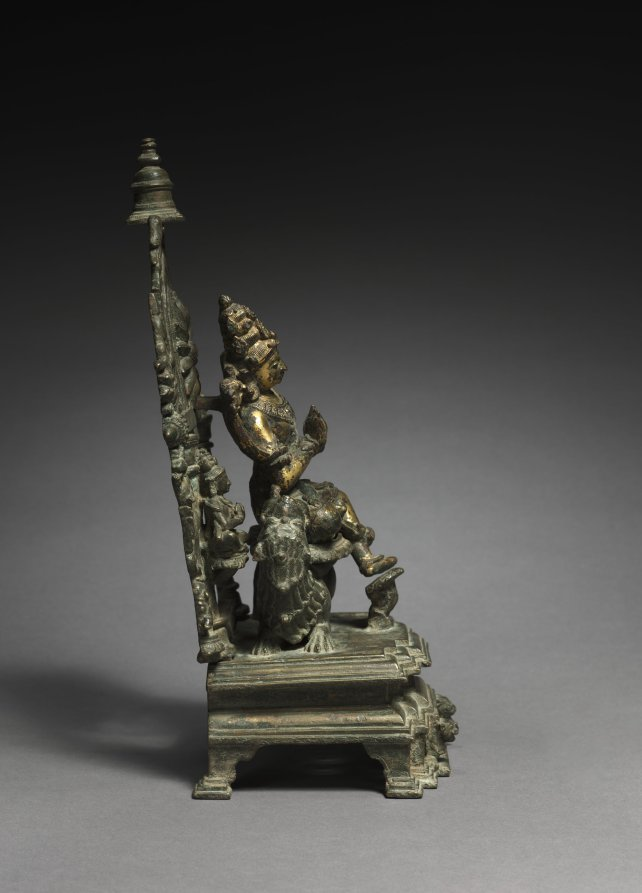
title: Bodhisattva Manjushri: Lord of Wisdom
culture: East India, Bengal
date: 1000s–1100s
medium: Bronze with gilding and inlay of semiprecious stones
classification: Sculpture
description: The Bodhisattva of Wisdom can be identified by the lion mount, the horizontal palm-leaf manuscript on the lotus above his left shoulder, and the stupa above his head. His seat and footrests are lotus flowers, indicating transcendence of the ordinary world.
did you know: His hand gestures show that he teaches the wisdom that leads to enlightenment.